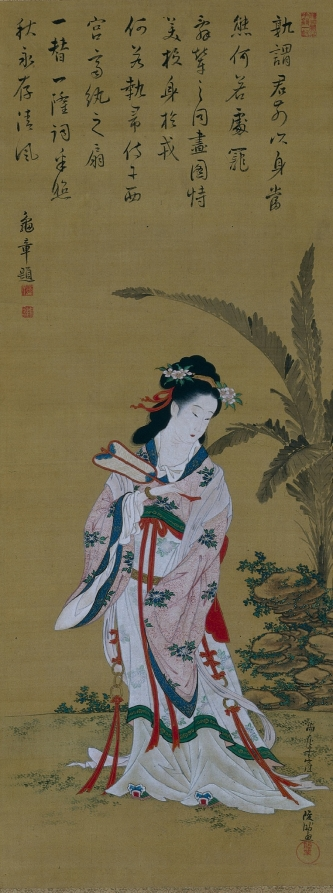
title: Chinese Beauty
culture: Japan, Edo period (1615–1868)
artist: Kubo Shunman (Japanese, 1757–1820)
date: late 1700s–early 1800s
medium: Hanging scroll; ink and color on silk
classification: Painting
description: Ukiyo-e artists’ exploration of beautiful people extended to figures from other lands. Here, an elegant Chinese palace lady holding a fan stands before a banana plant. The poem at the top is written in a Japanese appropriation of Chinese called kanbun. Based on its imagery of a palanquin (an enclosed couch with poles used for carrying passengers), silk fan, and autumn winds, it may allude to the story of Lady Ban (about 48 BC–about AD 2). A Chinese beauty famous for her scholarly achievements, Ban was once consort to an emperor but later lost his favor. In a poem attributed to her, she compared herself to a used silk fan put away in autumn.